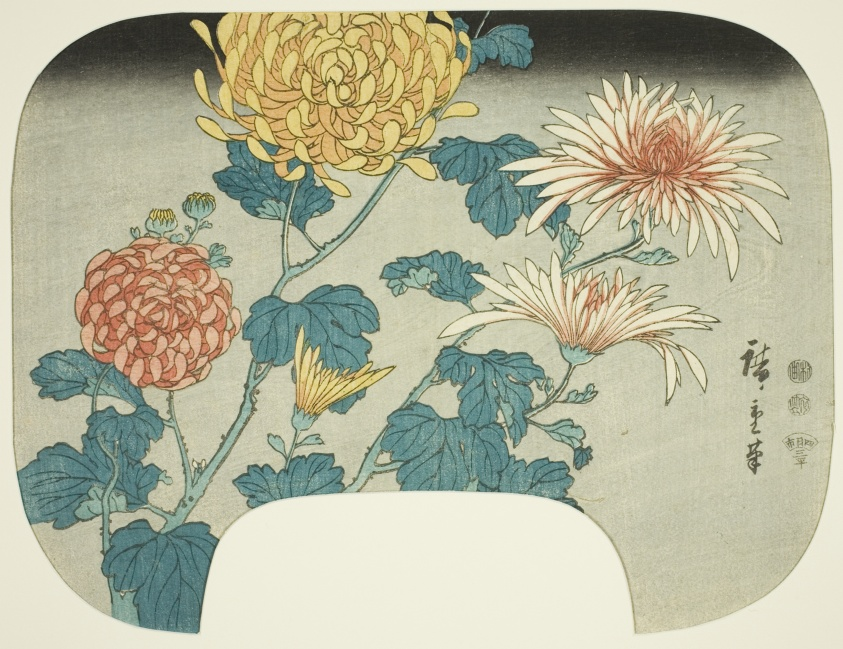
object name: Print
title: Chrysanthemums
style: Japanese (culture or style)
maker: Utagawa Hiroshige 歌川 広重; Japanese, 1797-1858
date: c. 1840s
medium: Color woodblock print; uchiwa-e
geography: Japan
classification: woodblock print; print; asian art